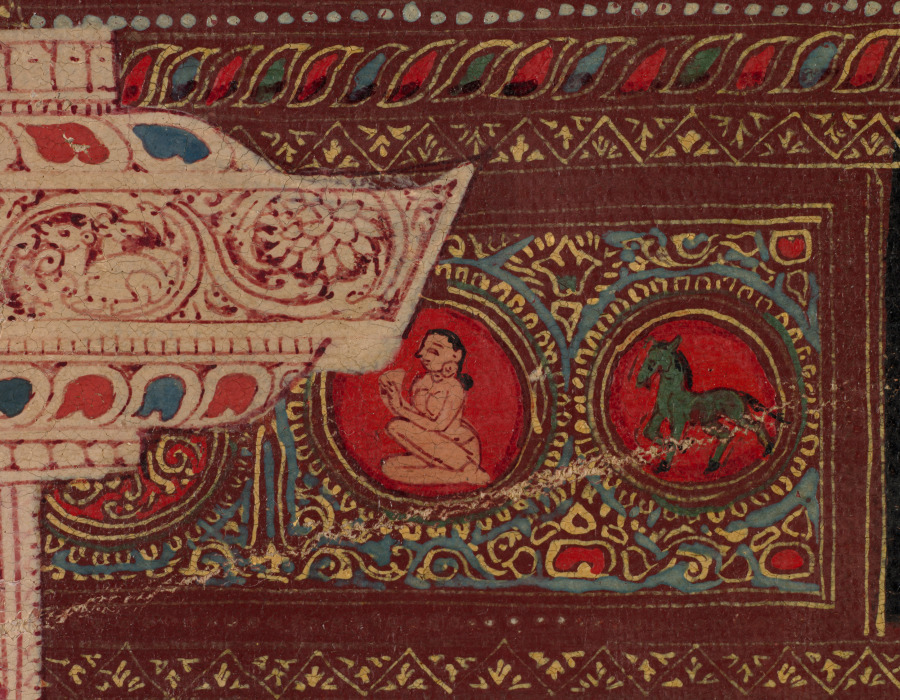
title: Green Tara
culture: Central Tibet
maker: attributed to Aniko (Nepalese, active in Tibet mid- to late 1200s)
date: c. 1260s; mounted, 2020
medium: thangka; gum tempera, ink, and gold on sized cotton; mount: silk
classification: Painting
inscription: Om Ah Hum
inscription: om tare tutare ture svaha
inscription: Om Ah Hum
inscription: Om Ah Hum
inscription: om ah sarva vyida svaha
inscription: ye dharmā hetuprabhavā he- tuṃ teṣāṃ tathāgato hy avadat teṣāṃ ca yo nirodha evaṃvādī mahāśramaṇaḥ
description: For Tibetans, Green Tara is one of the preeminent figures of their Buddhist faith, a radiant savioress who embodies the female form of the perfect, enlightened mind. The Green Tara in the Cleveland thangka—a Tibetan devotional painting on cloth—specifically dispels fear and provides protection, just like her mantra inscribed on the back side of the painting. Her green color and fear-not gesture link her to the cosmic Buddha of the North, enshrined above her head. Most scholars agree that this work was painted by the celebrated Nepalese artist known as Aniko.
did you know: The tiny monastic figure under Green Tara's right hand commissioned the painting.